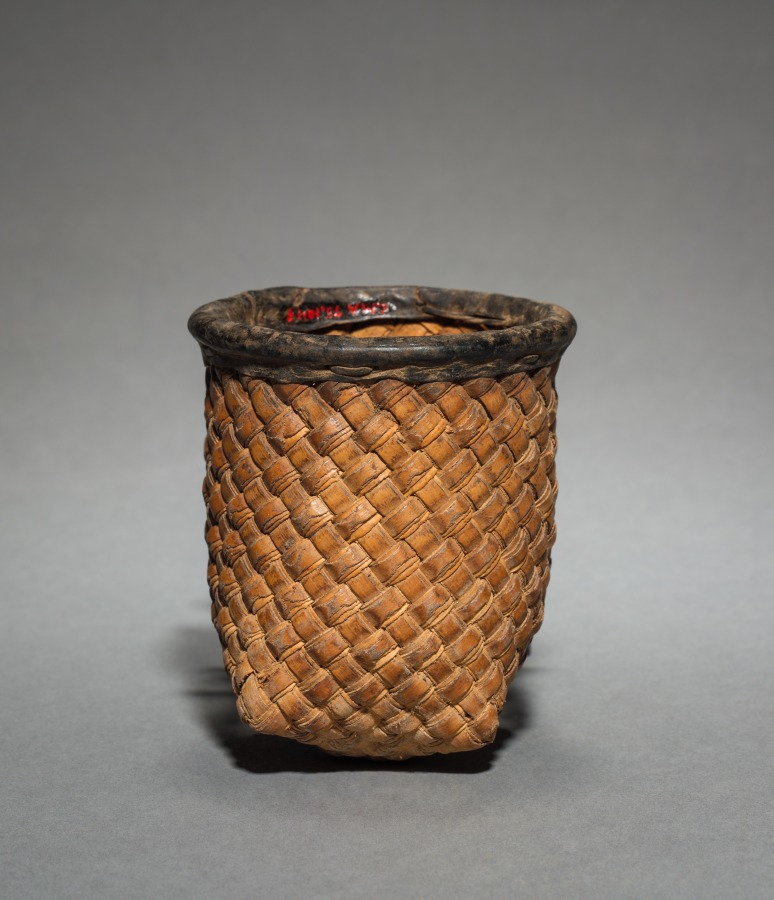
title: One of Ten Nesting Wedding Baskets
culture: Africa, Western Sudan, Burkina Faso, Lobi, 20th century (?)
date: c 1900s ?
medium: Plant fiber and leather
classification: Vessels